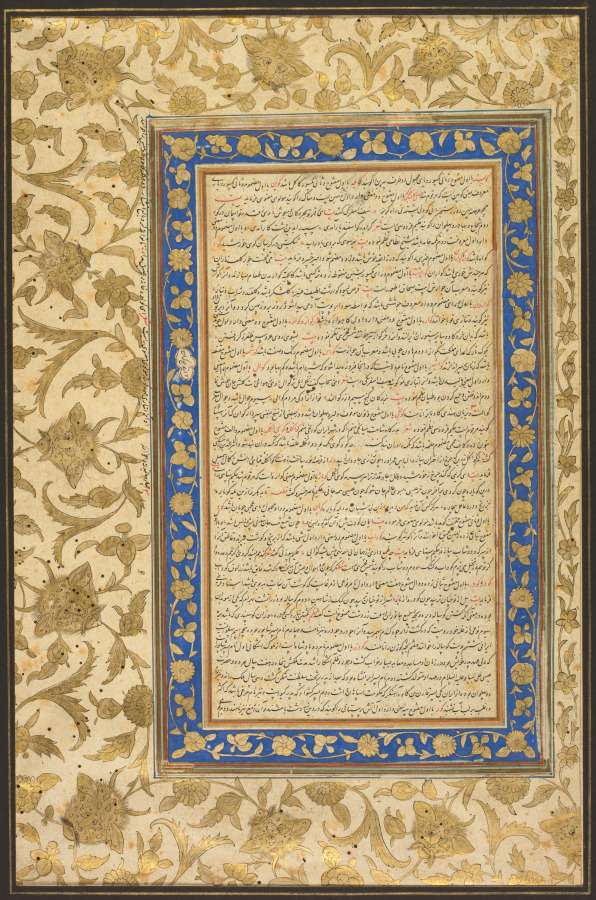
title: From the Farhang-i Jahangiri (Persian-language Dictionary) compiled by Mir Jamal al-Din Husayn Inju of Shiraz (Persian, d. 1626)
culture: Mughal India, court of Jahangir (1605–1627)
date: 1607–8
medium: Gum tempera, ink, and gold on paper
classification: Painting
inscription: Recto: “kuyesteh” (misspelling of “kunisteh,” meaning two halves of the buttocks) to “Gur” (name of a people in India); Verso: “Gur” to “Gush” (morning east breeze, zephyr)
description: Farhang-i Jahāngīrī, one of the most complete and authoritative dictionaries of the Persian language, was compiled by Mir Jamal al-Din Husayn Inju. It took him 12 years to compile over 9,000 words with definitions and examples from verses by Persian poets. He was born in Shiraz, Iran, but lived most of his life in Agra, India, so the dictionary was named honor of the Mughal emperor Jahangir, who reigned from 1605 to 1627.